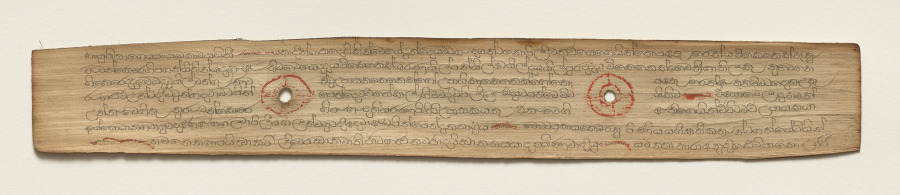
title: Leaf from a Buddhist Manuscript (verso)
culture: Sri Lanka, Singhalese, Late 17th century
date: c. 1700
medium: fiber paper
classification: Manuscript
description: Palm leaf material is still used for manuscripts in Sri Lanka. The palm leaves are prepared first by boiling them, drying them in the sun, and then rubbing them with oils. Scribes then use a metal stylus to incise the text. Then charcoal powder is wiped across the pages, filling in only the inscribed lines.